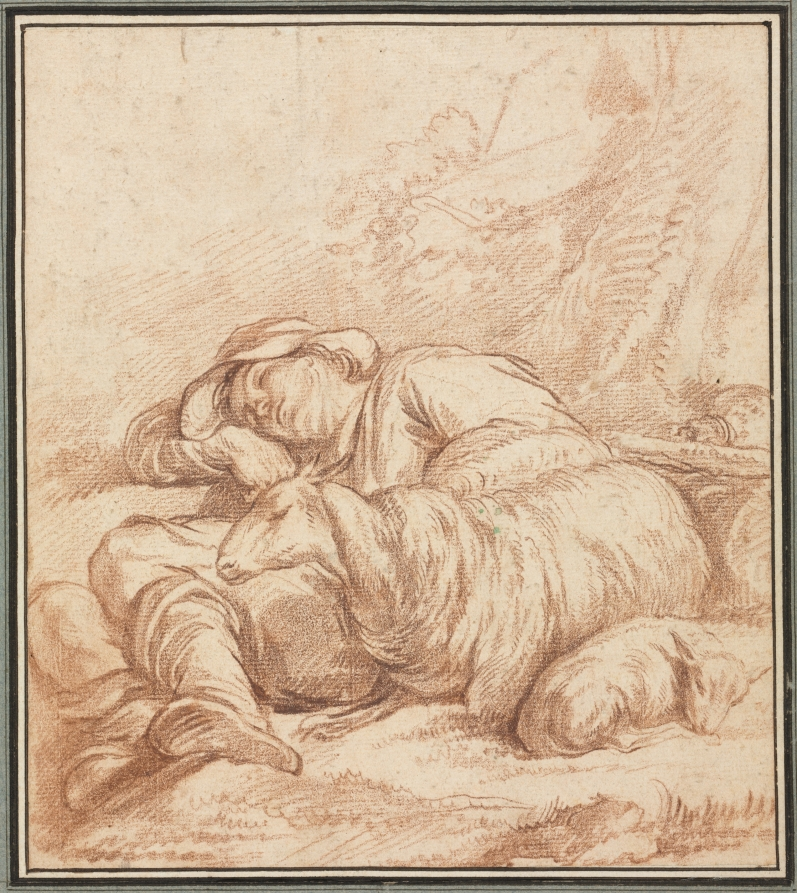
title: A Sleeping Shepherd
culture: France, 18th or 19th century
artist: Pierre Alexandre Wille (French, 1748–1837)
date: 1700s-1800s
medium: red chalk on laid paper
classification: Drawing